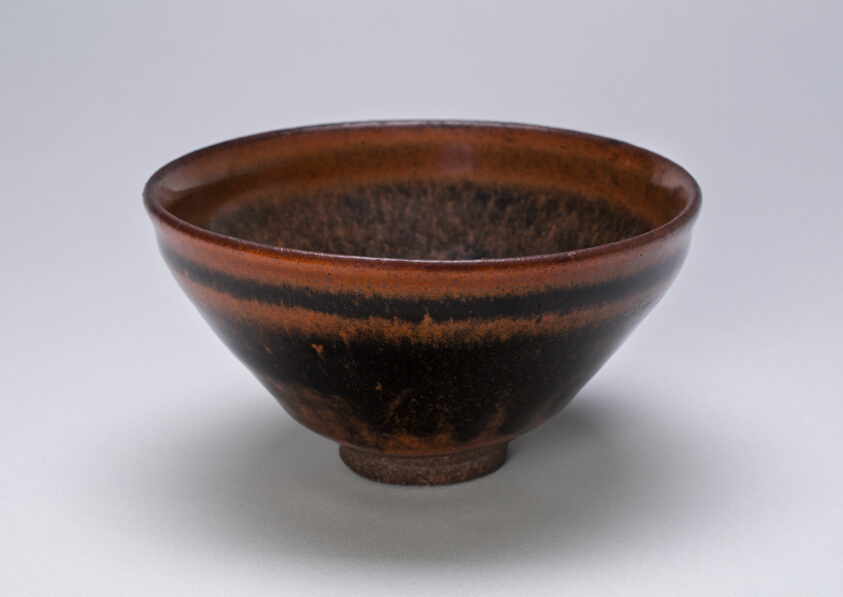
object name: Vessel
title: Teabowl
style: Chinese (culture or style)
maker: China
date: Song dynasty (960–1279), 12th/13th century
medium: Jian ware; stoneware with dark brown glazes and "hare's fur" markings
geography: China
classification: drinking vessel; ceramics; vessel